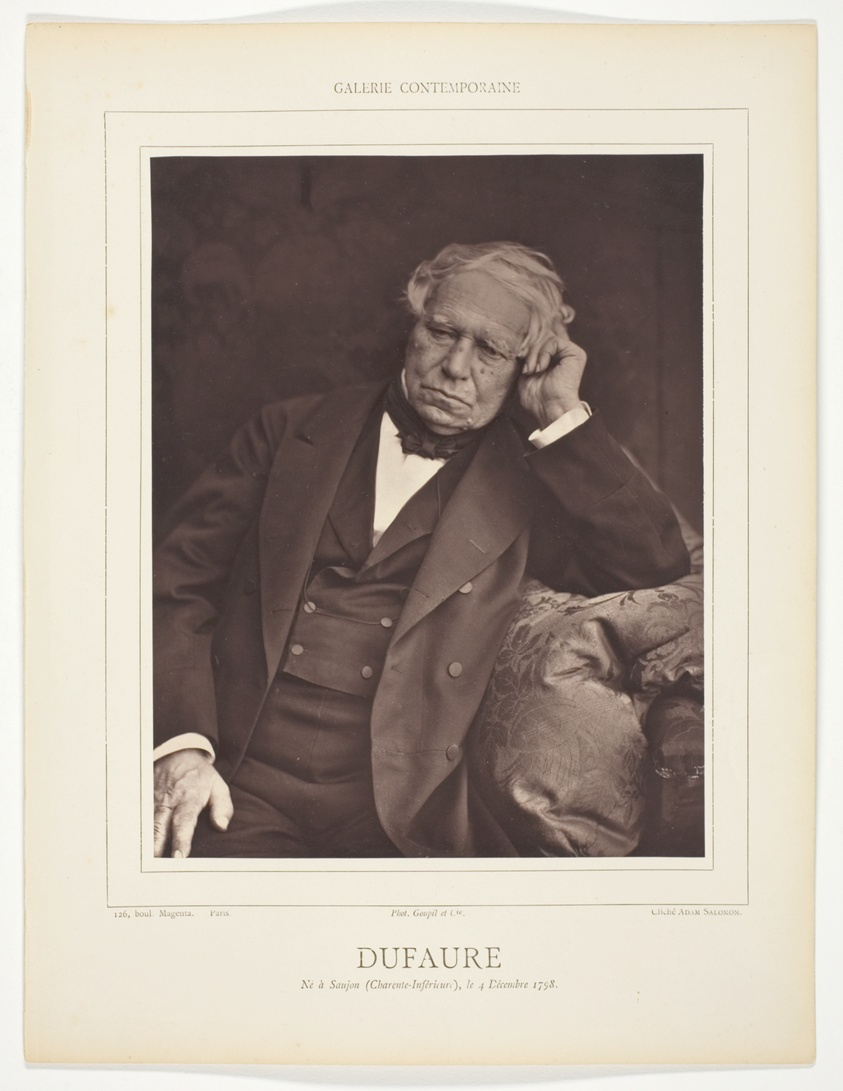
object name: Photograph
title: Dufaure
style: 19th century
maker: Antoine Samuel Adam-Salomon (French, 1811–1881)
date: 1876/84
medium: Woodburytype, from the periodical “Galerie Contemporaine Littéraire, Artistique” (1878), volume 6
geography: France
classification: woodburytype; photomechanical process; photography; photograph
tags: Collected by Hugh Edwards, Contemporaine Littéraire